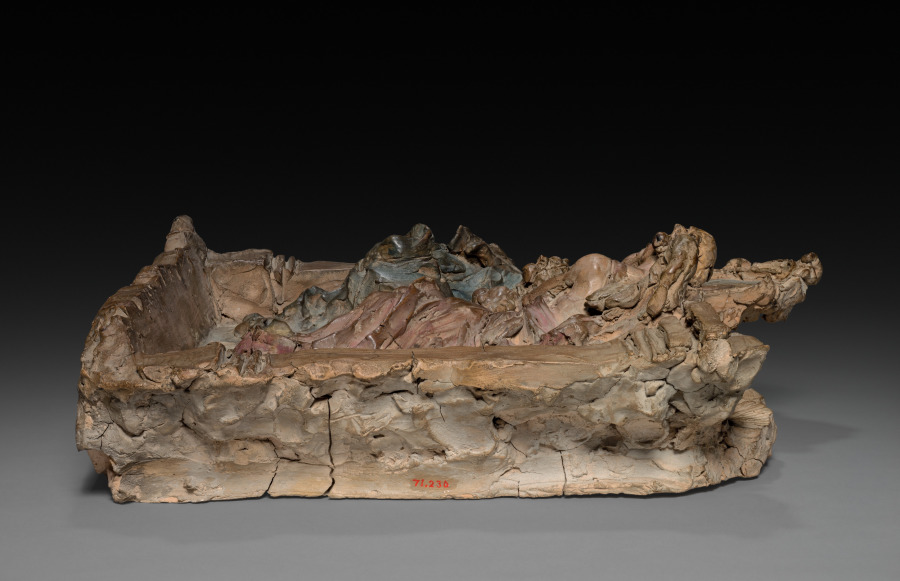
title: Two Angels and Cherubs Bearing an Icon of Christ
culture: Italy, Rome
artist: probably by Paolo Naldini (Italian, 1616–1691)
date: c. 1670–80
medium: terracotta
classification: Sculpture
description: This work is probably a study for a large altarpiece that would have combined several materials, including marble, stucco, and paint. The artist modeled his design in soft clay, which was then hardened by firing; subtle tints suggest the richness of the finished work. The idea of using sculptural figures to support a painted image within an altarpiece was influenced by the work of the Roman sculptor Gian Lorenzo Bernini (1598–1680), with whom Naldini is known to have worked.